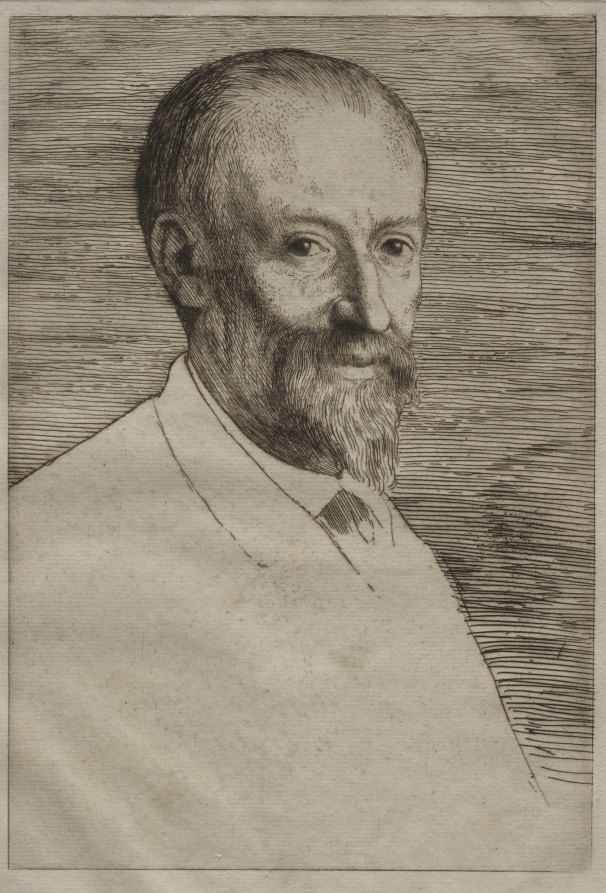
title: Auguste Poulet-Malassis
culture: France, 19th century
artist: Alphonse Legros (French, 1837–1911)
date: 1878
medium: etching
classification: Print